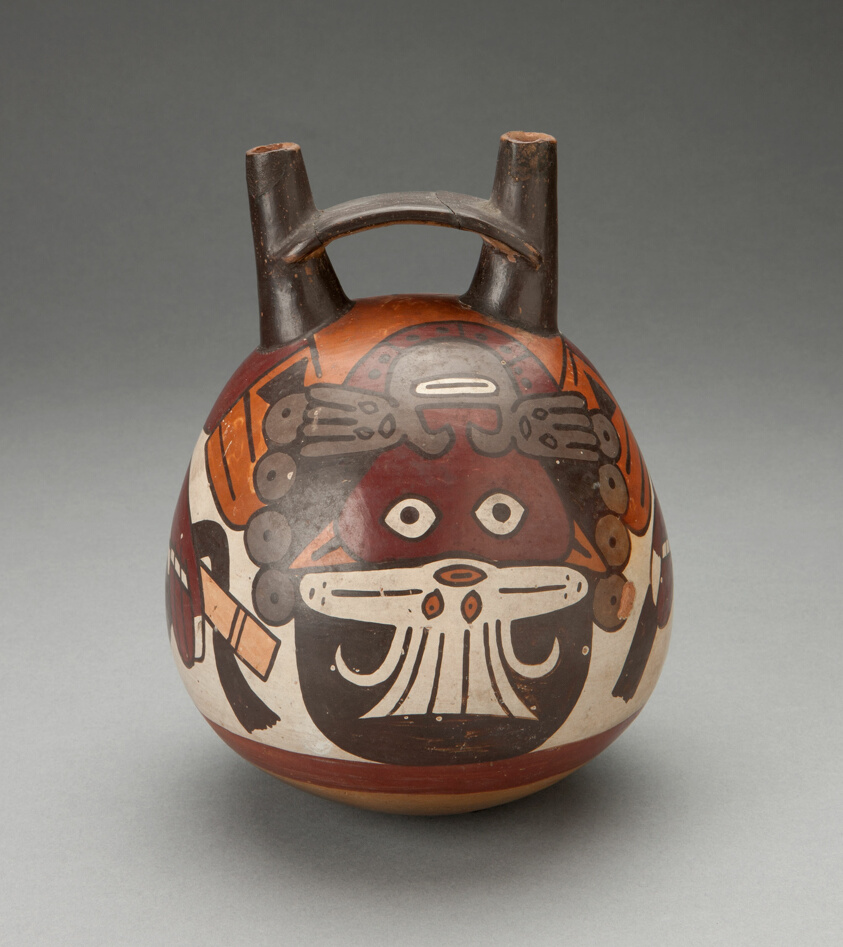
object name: Vessel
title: Double Spout Vessel Depicting Masked Figure Curving over Upper Surface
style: nazca, early intermediate period, Pre-Columbian, americas, Arts of the Americas, andean, andes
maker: Nazca; South coast, Peru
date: 180 BCE–500 CE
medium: Ceramic and pigment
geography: Nazca Valley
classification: earthenware; art of the americas; ceramics; vessel